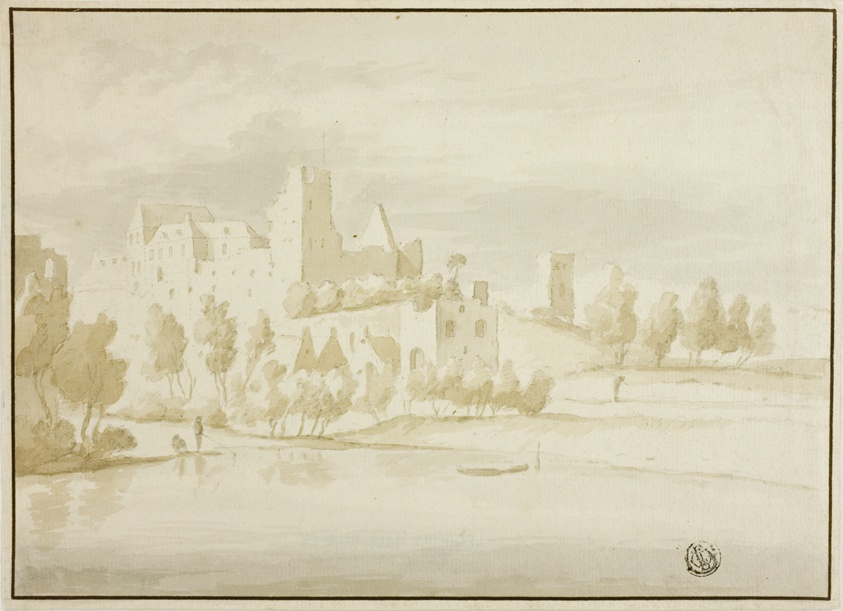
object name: Drawing and Watercolor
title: Castle Van Valkenburg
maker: Style of Jacob van der Ulft (Dutch, 1627-after 1688)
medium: Brush and gray and brown wash over traces of graphite, on cream laid paper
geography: Holland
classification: ink or chalk wash; drawings (visual works); prints and drawing